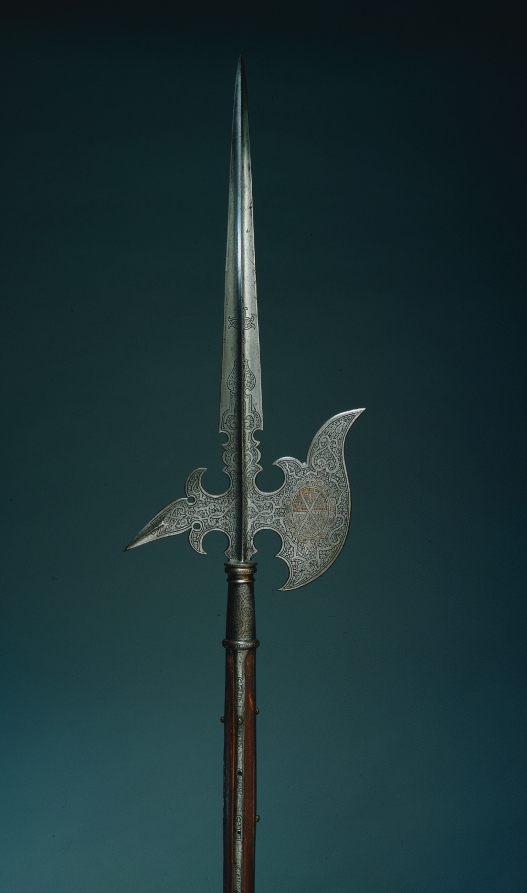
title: Parade Halberd (from the state guard of Elector Christian I of Saxony [ 1560- 91])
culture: Germany, Saxony, late 16th Century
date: 1586–91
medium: steel, gilt and etched; round wood haft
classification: Arms and Armor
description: The halberd was a staff weapon favored by European infantries (foot soldiers) of the 1400s and 1500s for its versatility and deadly effect. The word halberd comes from the German words Halm (staff) and Barte (axe). The halberd is, in fact, an axe that served multiple functions: the axe blade was used for hacking, the spike for thrusting, and the beak for piercing plate armor or for pulling a knight from his saddle. The halberd was used by shock troops (those who lead an attack) and by Swiss and German mercenaries. After about 1550, the halberd gradually became less functional. Its large blade provided space for coats of arms and insignia. By the late 1500s, the parade halberd had become a ceremonial weapon for palace guards.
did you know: This halberd is typical of the parade weapons used by the more than one hundred palace guards of the Prince Elector of Saxony, Christian I.